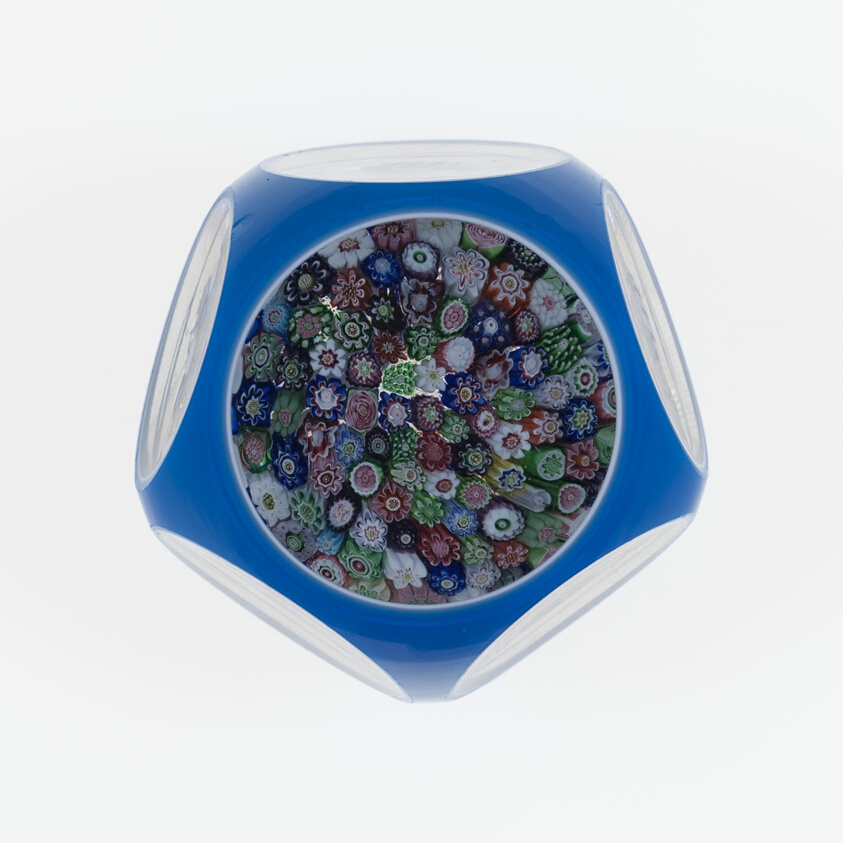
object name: Glass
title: Paperweight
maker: Clichy Glassworks (Cristalleries de Clichy); Clichy, France, 1837-1885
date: c. 1845–55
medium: Glass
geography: Clichy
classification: paperweight; millefiori; european decorative arts; glass